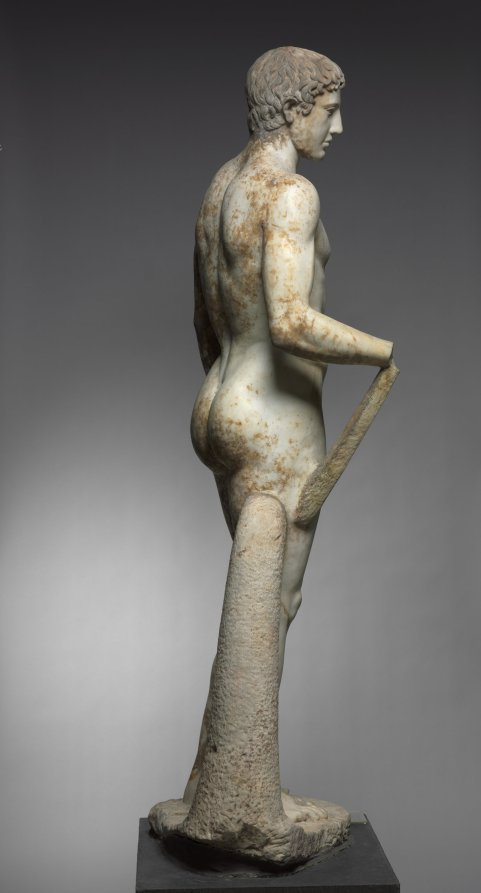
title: Statue of an Athlete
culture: Italy, Roman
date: 1–100 CE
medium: marble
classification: Sculpture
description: This idealized athlete recalls Greek sculptural types invented and popularized during the 400s BC. Large-scale athletes and other sculptures like this were originally created by famous artists as sanctuary dedications. Centuries later, they were widely copied and adapted by Roman sculptors, whose clients sought their own versions of earlier masterpieces. Working in marble rather than bronze, these sculptors added certain elements for stability, such as the struts and the large tree trunk beside the right leg here. Sculptures like this one are profoundly complex, made by and for Romans but descended from Greek ancestors.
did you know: For many years, this sculpture stood in the rotunda of the Cleveland Museum of Art.